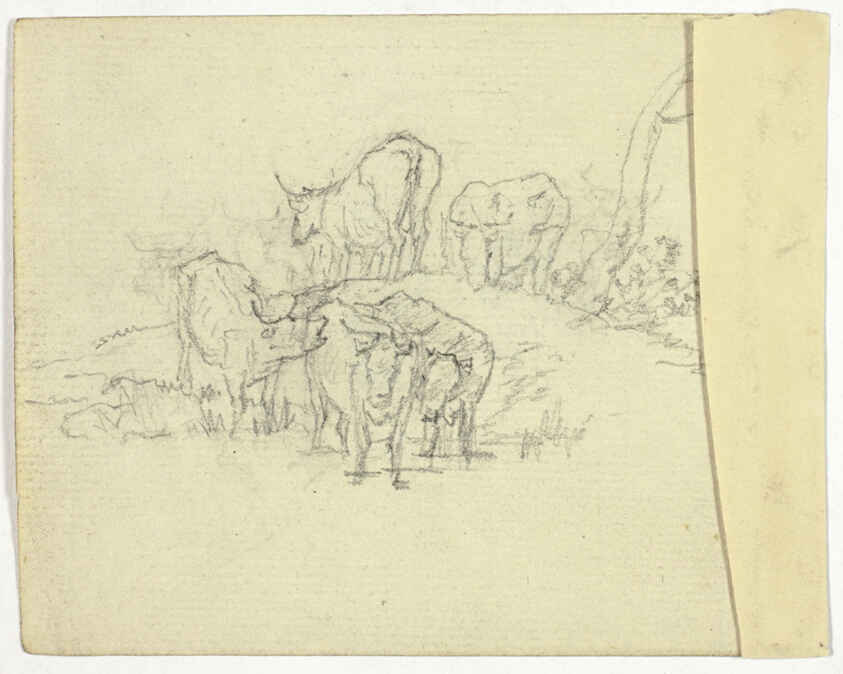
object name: Drawing and Watercolor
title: Cattle (recto); The Charlatan (verso)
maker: William Henry Pyne (English, 1769-1843)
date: n.d. (recto); 1789/1843 (verso)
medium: Graphite (recto and verso) on ivory laid paper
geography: England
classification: graphite; drawings (visual works); prints and drawing